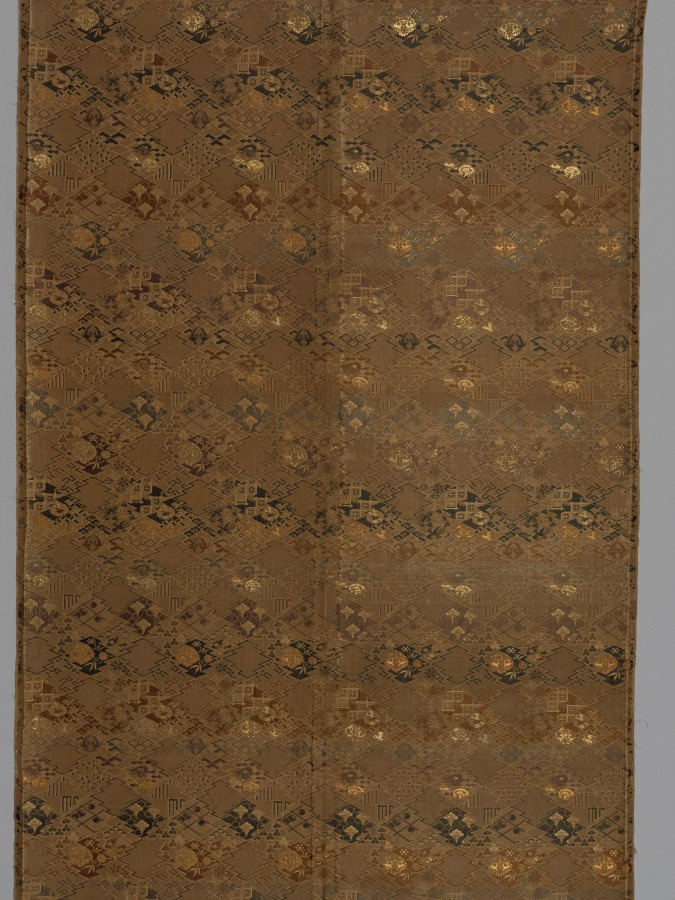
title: Length of Textile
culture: Japan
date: late 1800s–early 1900s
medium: silk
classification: Textile